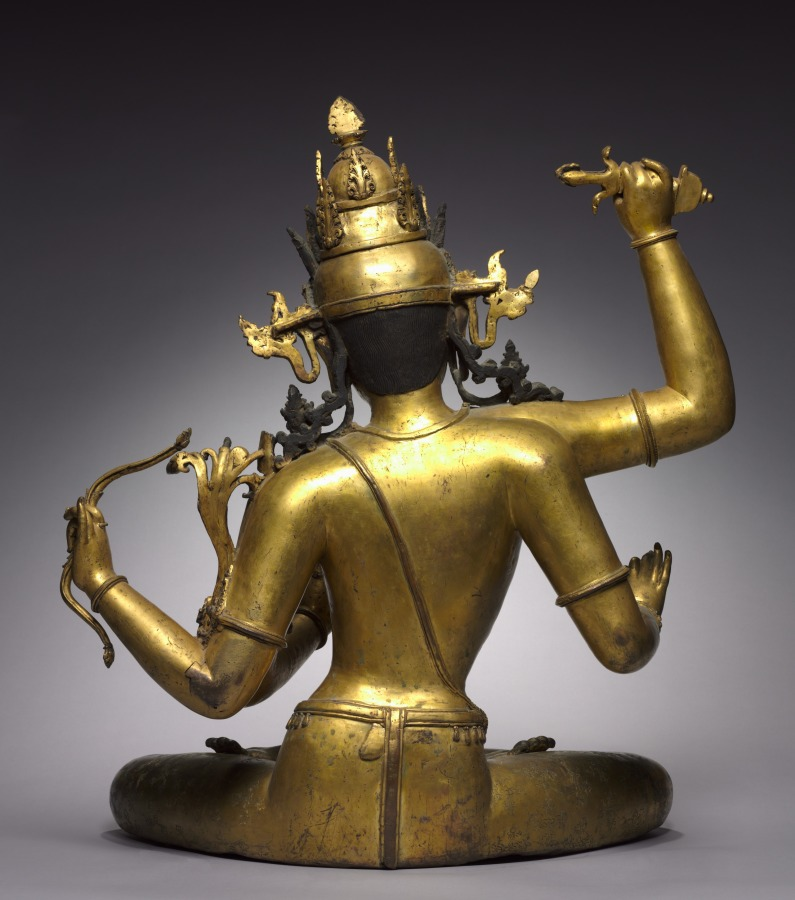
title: Bodhisattva of Wisdom (Manjushri)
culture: Nepal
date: 1400s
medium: Gilt bronze with precious and semiprecious stones, gum tempera, and cold gold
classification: Sculpture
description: This image depicts one of the main bodhisattvas, beings only one stage away from full enlightenment. Because the historical Buddha was a prince prior to his renunciation and life as a wandering ascetic, bodhisattvas are depicted as royal princes. This example has the sharp features, sweet expression, and crisp details characteristic of images made in Nepal during the 1400s. In his upraised right hand Manjushri holds the hilt of a sword that, like wisdom itself, metaphorically cuts through and defeats ignorance. His lower, rear left hand grasps a bow, once probably strung with a wire. Also missing is the arrow that he likely held in his lowered right hand. Arrows were often symbols for mantras, or strings of syllables thought to have the power to focus the mind and work like missiles to destroy negativity and affliction. The gesture of his lowered left hand indicates the transmission of Buddhist teachings. The lotus stem that rises at the left elbows originally held a book of sutras. This figure is in the yogic posture of meditation with the big toe flexed in concentration. Yoga is of central importance in tantric Buddhism, because high-level practitioners are able to discipline the body to such an extent that the mind can also be controlled.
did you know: The bodhisattva's short breeches are patterned in spiraling floral forms incised into the metal.